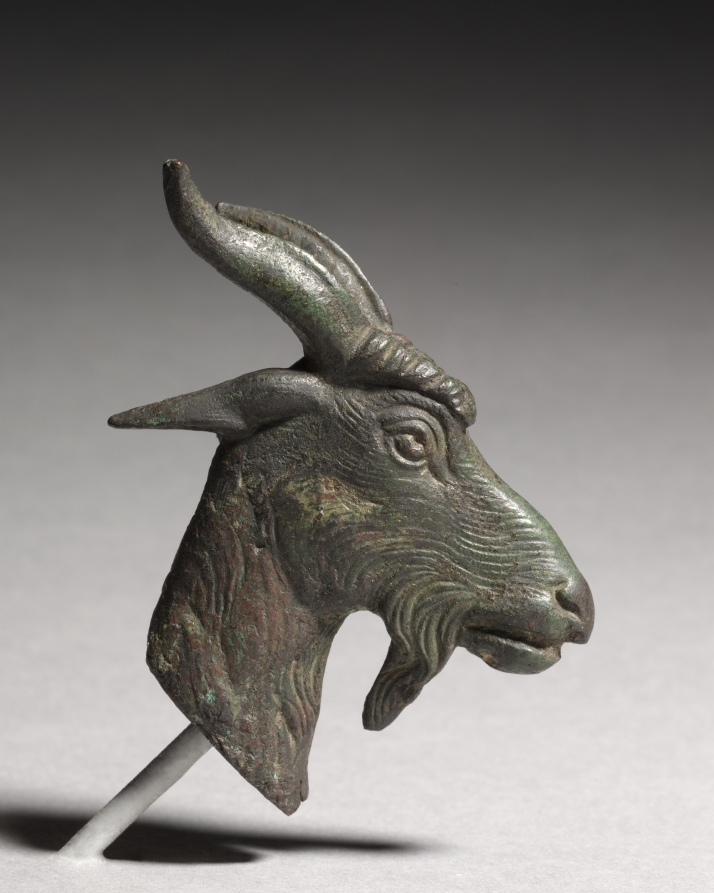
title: Head of a Goat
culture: Greece, Hellenistic period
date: 300–100 BCE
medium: bronze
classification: Sculpture